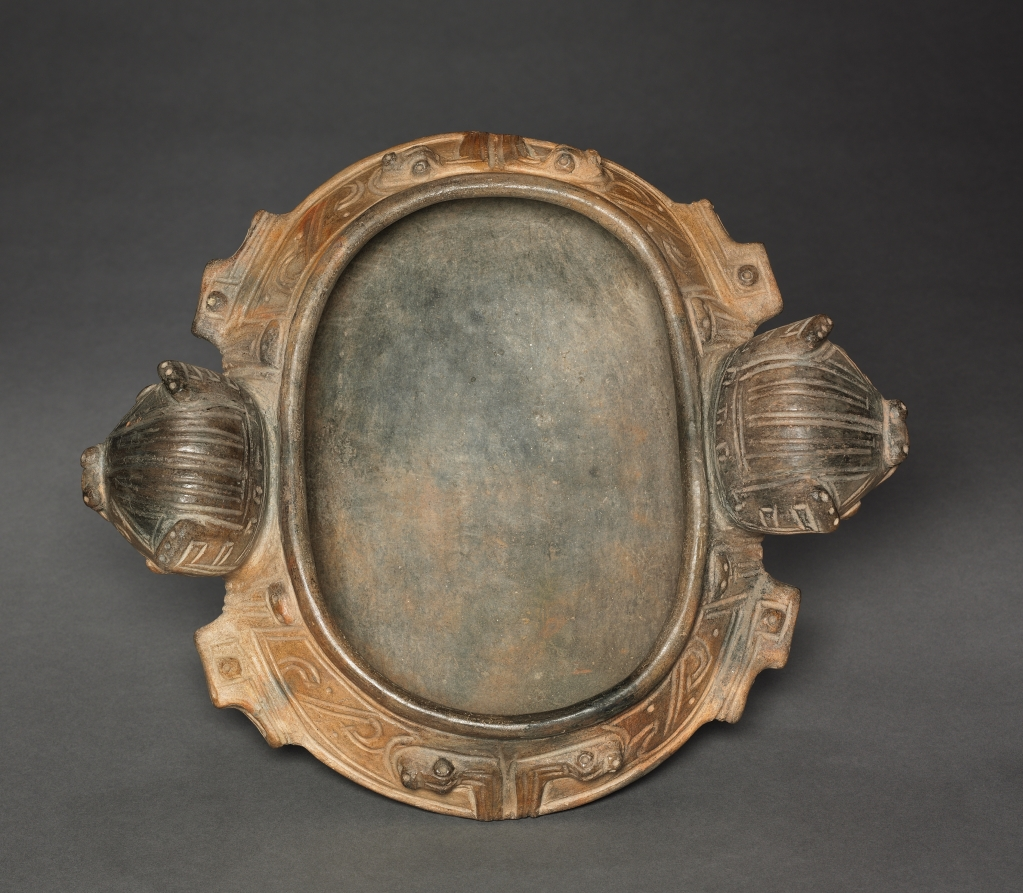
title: Double-Bat Bowl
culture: Colombia, Tairona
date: c. 900–1550 (thermoluminescence date, 810–1310)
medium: earthenware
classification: Ceramic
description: The archaeological Tairona civilization of mountainous northern Colombia is believed to be ancestral to the contemporary Kogi indigenous group. Ancient Tairona sites are terraced, and characterized by circular stone building foundations. The most famous form of Tairona art is gold jewelry, especially lost-wax cast figurines of chiefs, and anthropomorphic bats and birds. Tairona ceramics are less well known. This bowl has two protruding bat heads and four legs. The incurved sides of the bowl to either side of each head represents the bats' wings. The vessel's surface is decorated with raised serpents, as well as incised and impressed patterns.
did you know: The Tairona civilization lived in the mountains of northern Colombia.